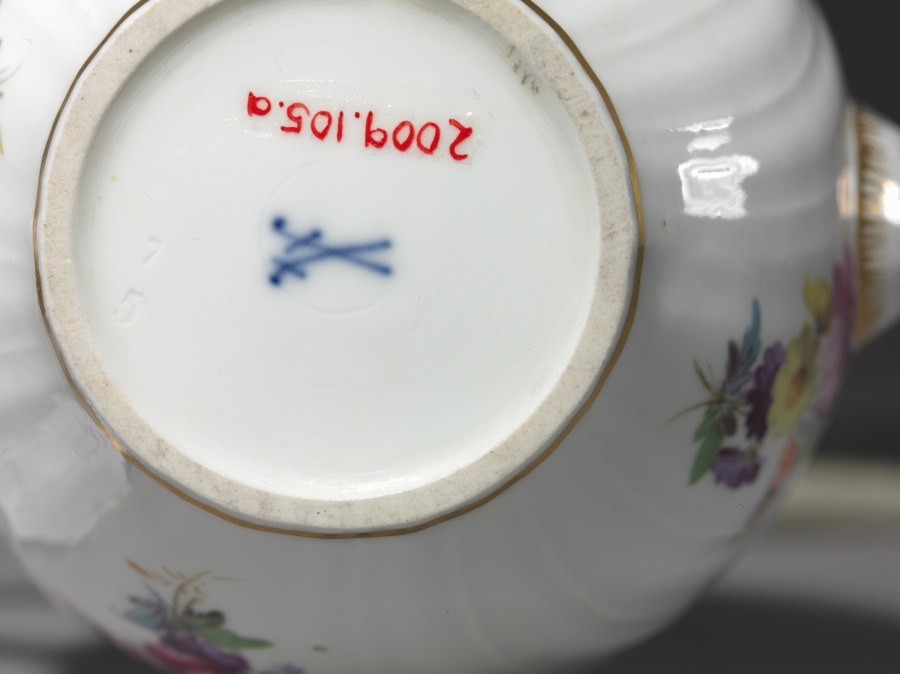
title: Teapot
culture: Germany, Meissen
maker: Meissen Porcelain Factory (German, est. c. 1710)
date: c. 1750–70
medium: porcelain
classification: Ceramic